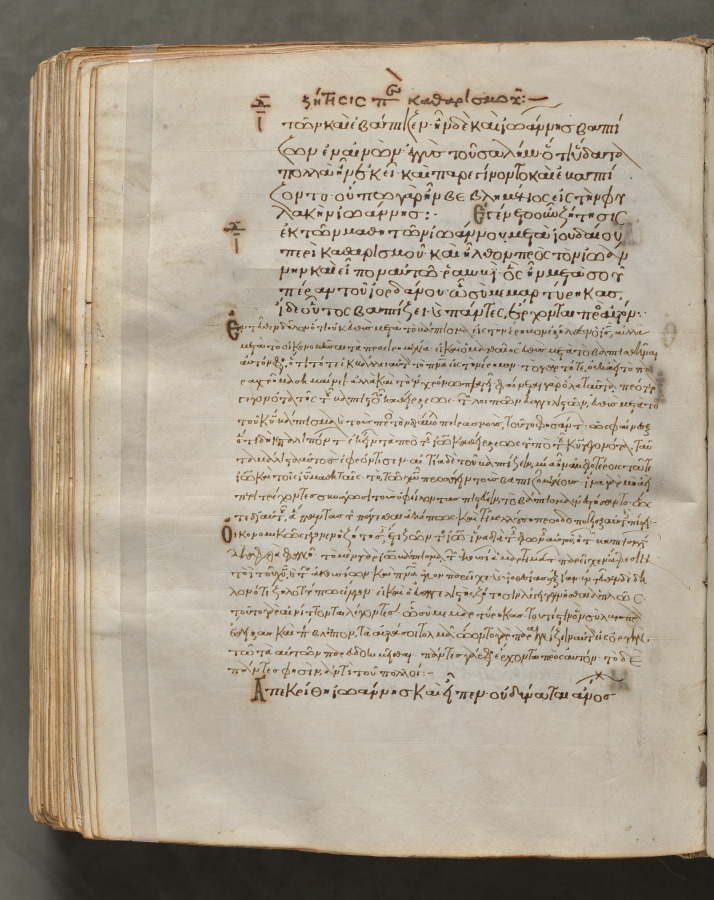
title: Text, folio 335 (verso), from a Gospel Book with Commentaries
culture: Byzantium, Constantinople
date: c. 1000–1100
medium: ink, tempera, and gold on vellum; leather binding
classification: Bound Volume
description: Each of the four gospels in this book opens on a page with brilliantly illuminated borders depicting the author of the text as well as birds—principally peacocks, symbols of the immortality of the soul—and fountains, representing the fountain of life and the salvation of the soul. This volume consists of 428 leaves with texts in Greek. Its level of sophistication suggests that it was probably written and decorated in a monastery in Constantinople.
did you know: Gospel books were carried in procession through Byzantine churches.